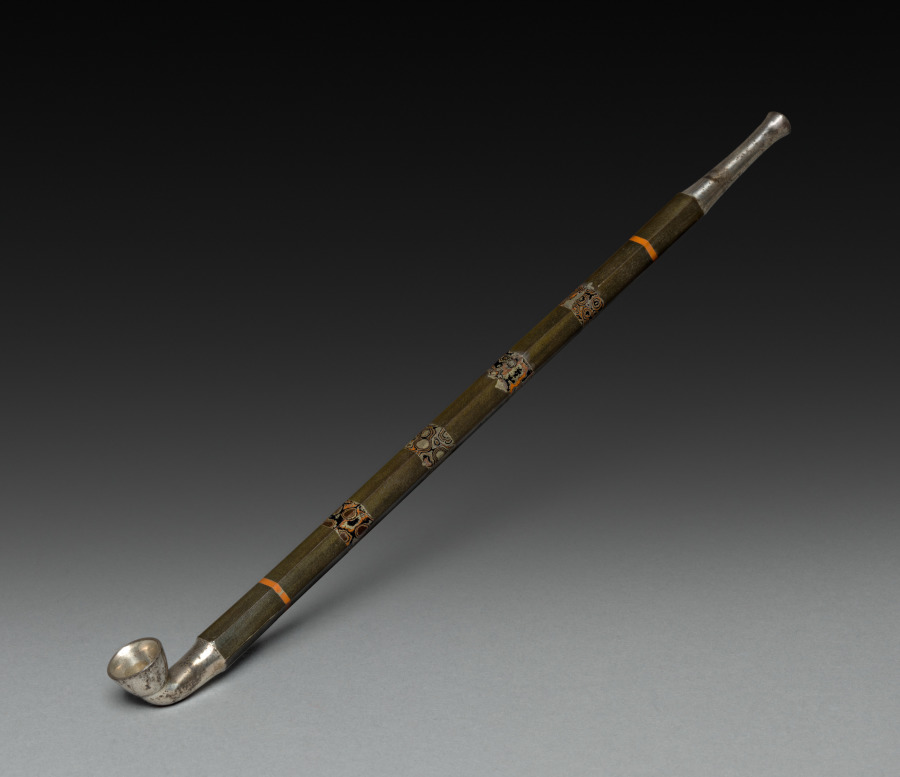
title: Tobacco Pipe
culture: Japan, Edo period (1615–1868)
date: 1700s to mid-1800s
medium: metal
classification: Miscellaneous